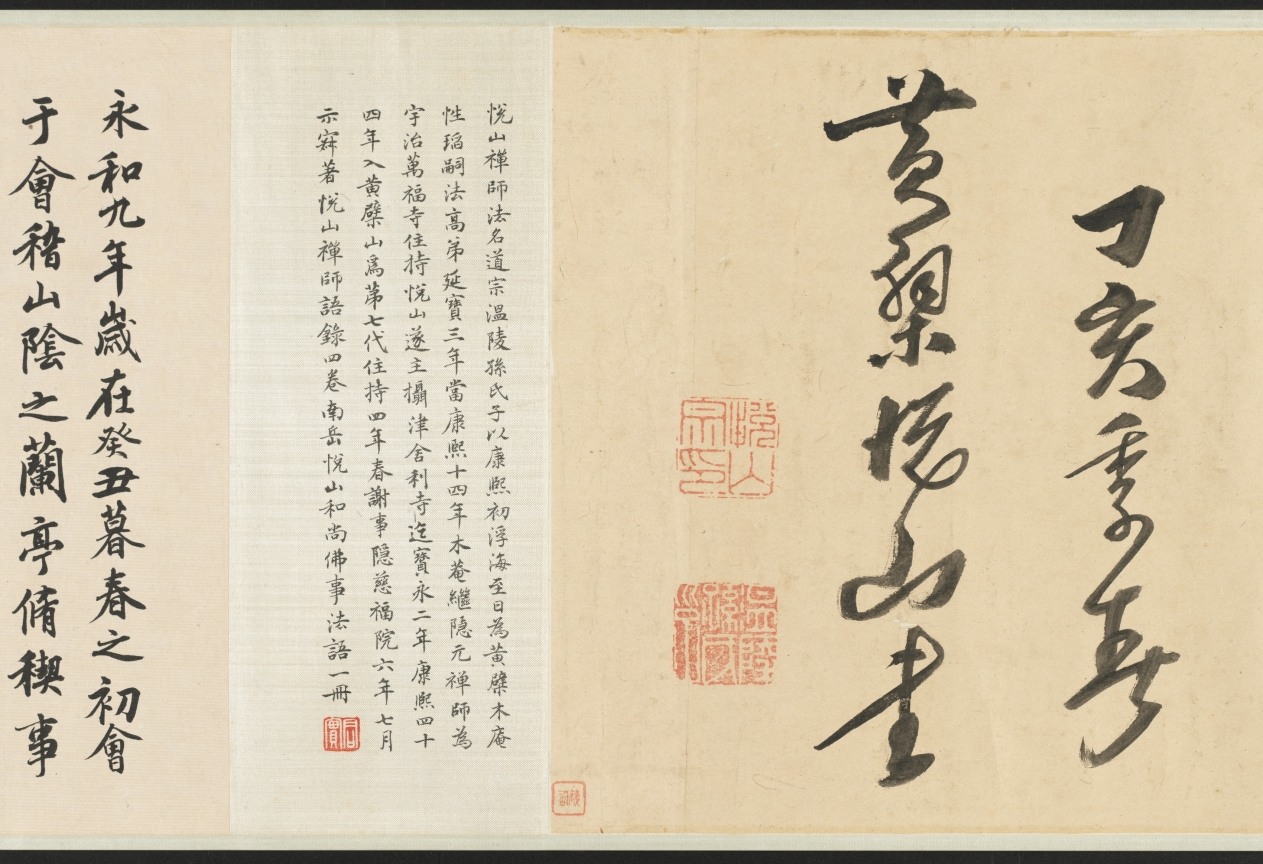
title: Purification at the Orchid Pavilion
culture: China, Qing dynasty (1644-1911)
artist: Fan Yi (Chinese, c. 1615–before 1688)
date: 1671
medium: Handscroll; ink and color on silk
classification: Painting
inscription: Artist's inscription, signature, and 2 seals: Painted by Fan Yi of Zhongfu during the second month of winter of the xinhai year [1671]. [2 seals] Fan Yi zhi yin, Zi yu yi.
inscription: Title on the frontispiece by Monk Yueshan (1629-1709).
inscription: 3 colophons and 13 additional seals: 1 colophon, dated 1707, and 6 seals of Yueshan; 2 colophons and 3 seals of Wong Kwan-Shut (Huang Junshi) 黃君實 (b. 1934); 2 seals of Fu Shen 傅 申 (b. 1937); 2 seals of Tessai Tomioka 富岡鐵齋 (1836-1924).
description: By the 1600s, the historic gathering at Lanting, Zhejiang province, in 353 CE was a common theme in Chinese painting. Originally based on a composition attributed to Li Gonglin (1049– 1106), now lost, Wu school artists revived the theme. Fan Yi, the brother of the artist Fan Qi from Nanjing, used delicate brushwork and luminous colors to depict the spring gathering.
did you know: The gathering’s host is in the Orchid Pavilion at the end of the scroll, representing an episode known as “Wang Xizhi Watching the Geese 王羲之觀鵝圖.”